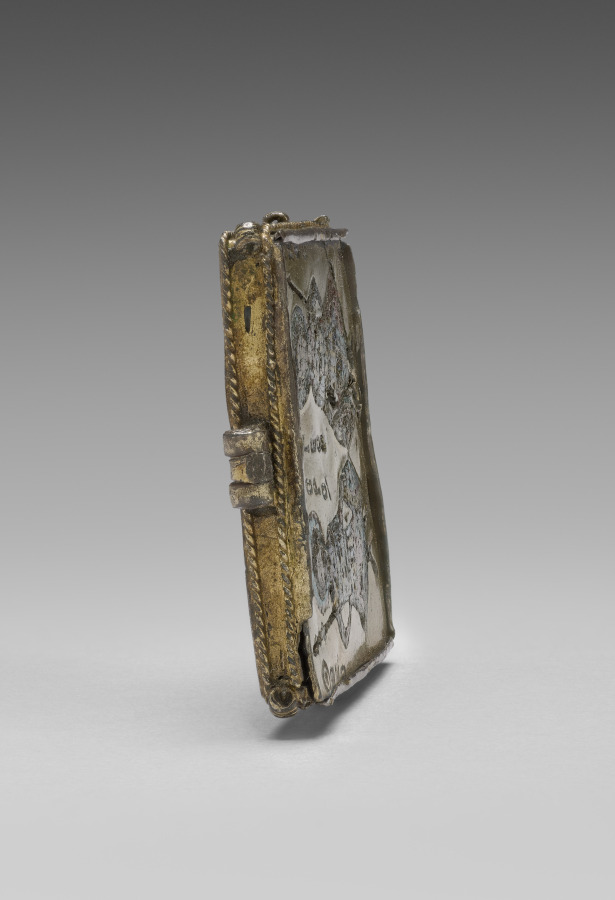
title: Enkolpion with the Crucifixion (front) and Saints Theodore and George (back)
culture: Byzantium, Constantinople, Byzantine period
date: 1080–1120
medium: silver gilt and cloisoné enamel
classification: Metalwork